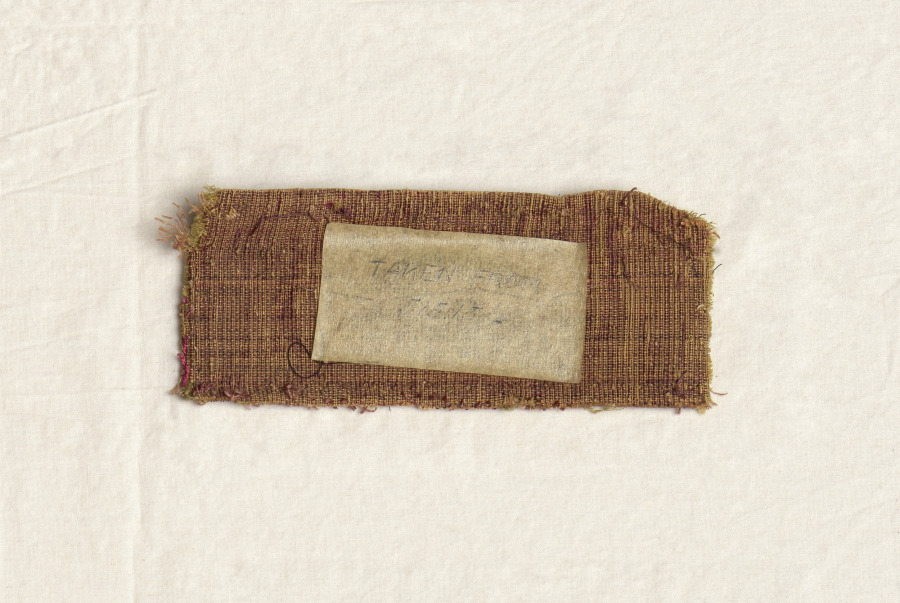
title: Fragments from Chasuble Front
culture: Italy, early 16th century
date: early 1500s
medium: velvet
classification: Velvet